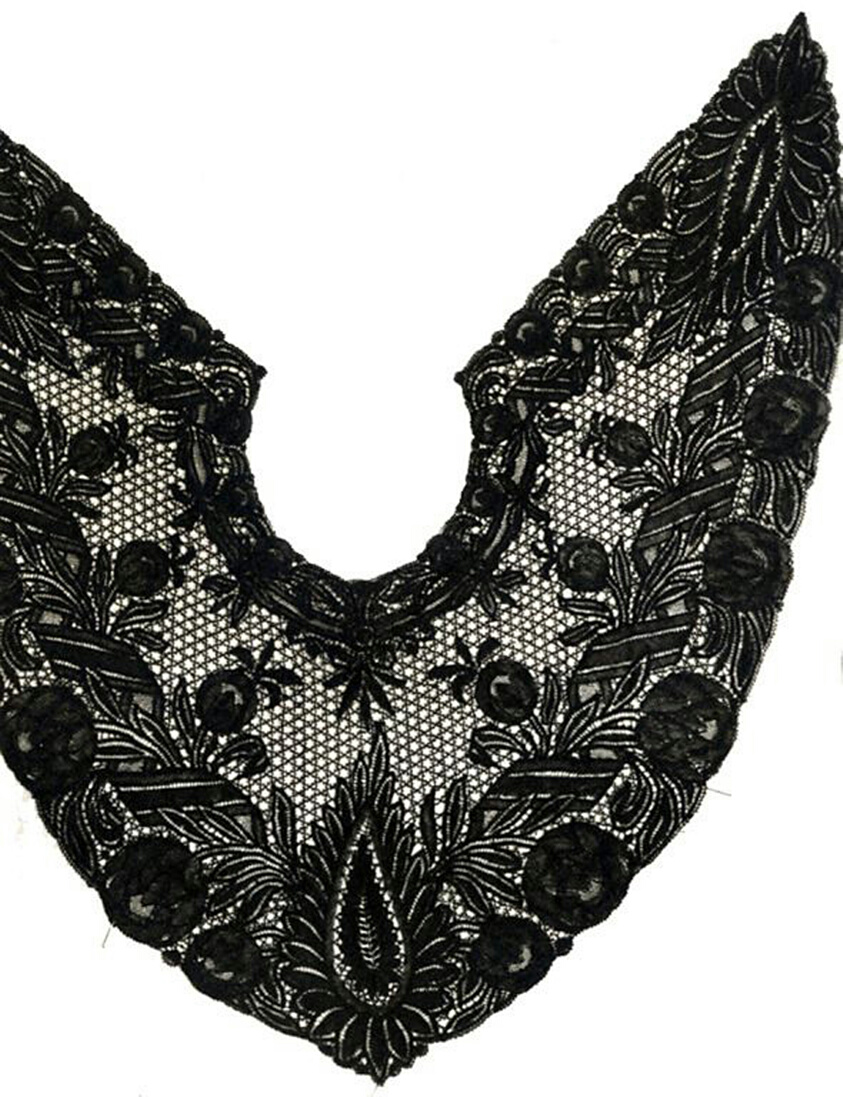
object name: Textile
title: Collar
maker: Probably France, Le Puy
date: c. 1880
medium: Silk, bobbin straight lace (made in concentric bands)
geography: France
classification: textile; lace - bobbin; lace